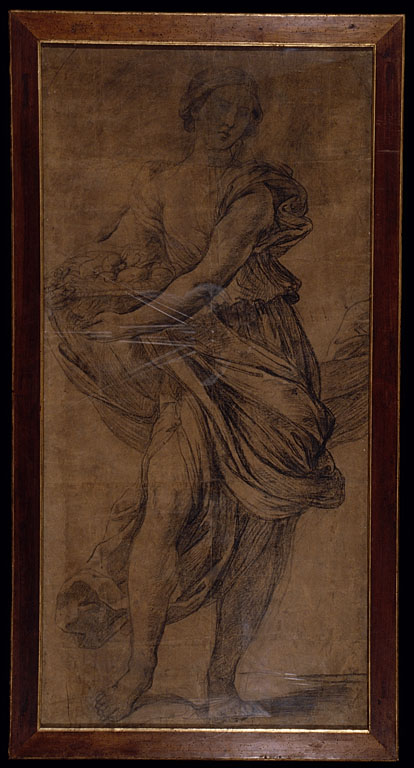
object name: Drawing and Watercolor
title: Pomona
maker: Attributed to Gian Giacomo Sementi; Italian, 1583–c. 1640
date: 1617/18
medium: Black chalk with stumping and black chalk wash on ten sheets of tan laid paper pieced onto secondary support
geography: Italy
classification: chalk; drawings (visual works); prints and drawing